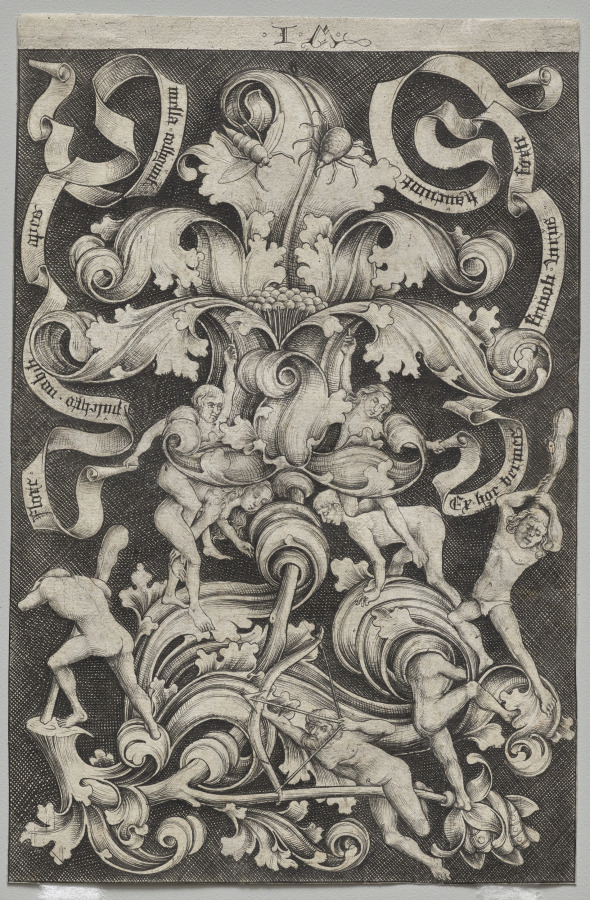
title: Upright Ornament with Eight Naked Men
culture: Germany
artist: Israhel van Meckenem (German, c. 1440–1503)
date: c. 1495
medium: engraving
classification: Print